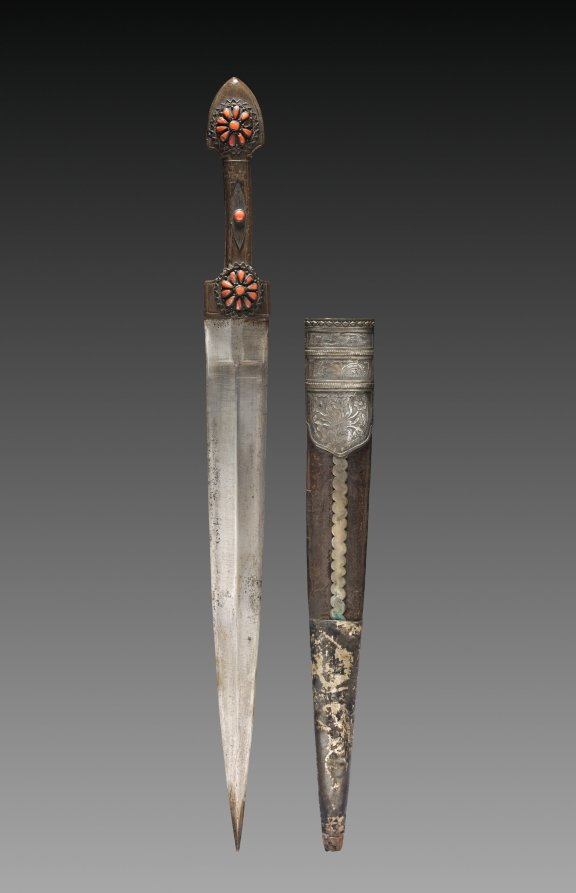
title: Dagger (Khanjali) with Scabbard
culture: Transcaucasian, Georgian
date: 1700s–1800s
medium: carnelian?, steel, wood handle, copper alloy, and silver gilt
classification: Arms and Armor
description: A khanjali is a dagger popular with the inhabitants of Georgia and the rest of the Caucasus since ancient times. They often have a single offset groove on each face of the blade and the shape is similar to the ancient Roman gladius and the Scottish dirk.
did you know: Scabbards for daggers like these are usually highly engraved with gold or silver designs and can sometimes include embedded gemstones.